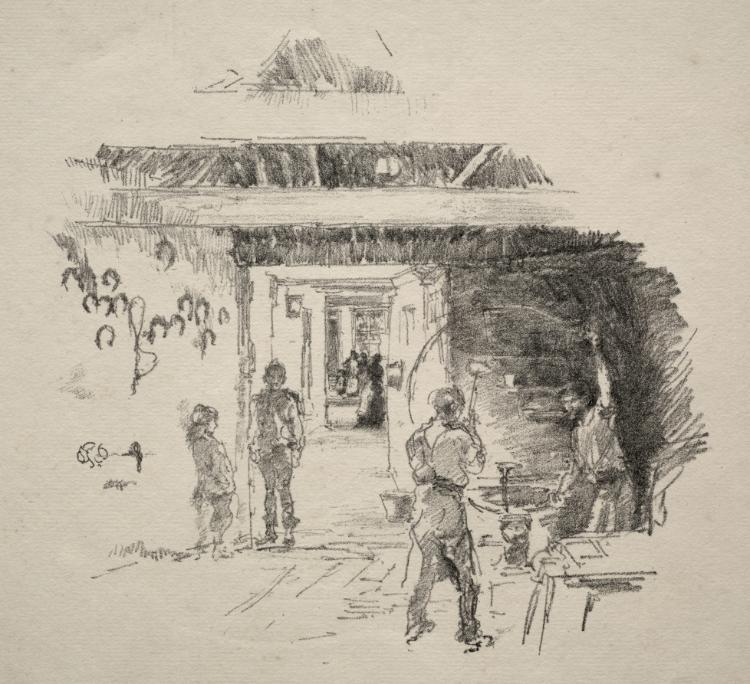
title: The Tyresmith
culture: America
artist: James McNeill Whistler (American, 1834–1903)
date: 1890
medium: lithograph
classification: Print